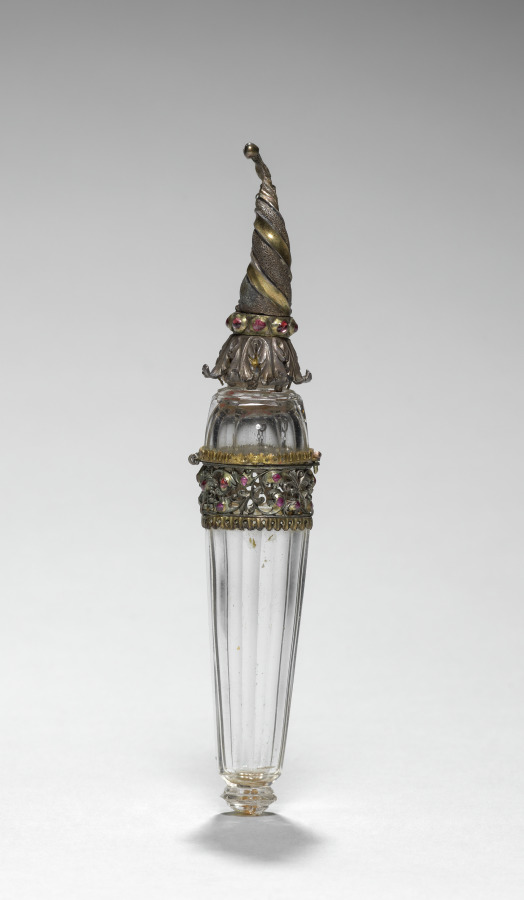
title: Scent Bottle (Vinaigrette)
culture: France, 19th century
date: 1800s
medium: glass mounted in silver (?) partially gilt and set with pink cabochon stones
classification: Miscellaneous